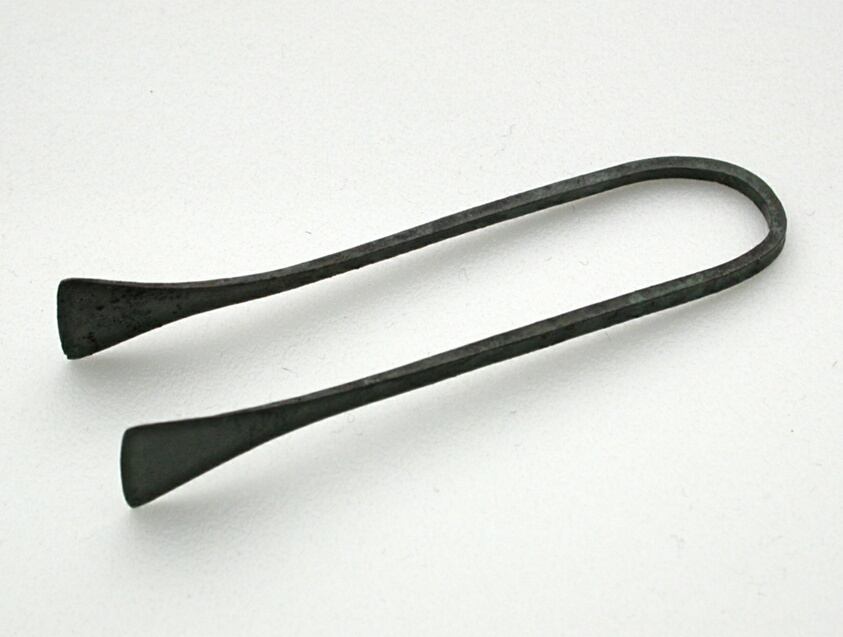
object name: Costume and Accessories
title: Tweezers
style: egyptian, ancient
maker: Egyptian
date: New Kingdom, Dynasty 19–20 (about 1295–1069 BCE)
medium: Bronze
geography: Egypt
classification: utensil; bronze; metal; ancient art; costume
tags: beauty, rituals